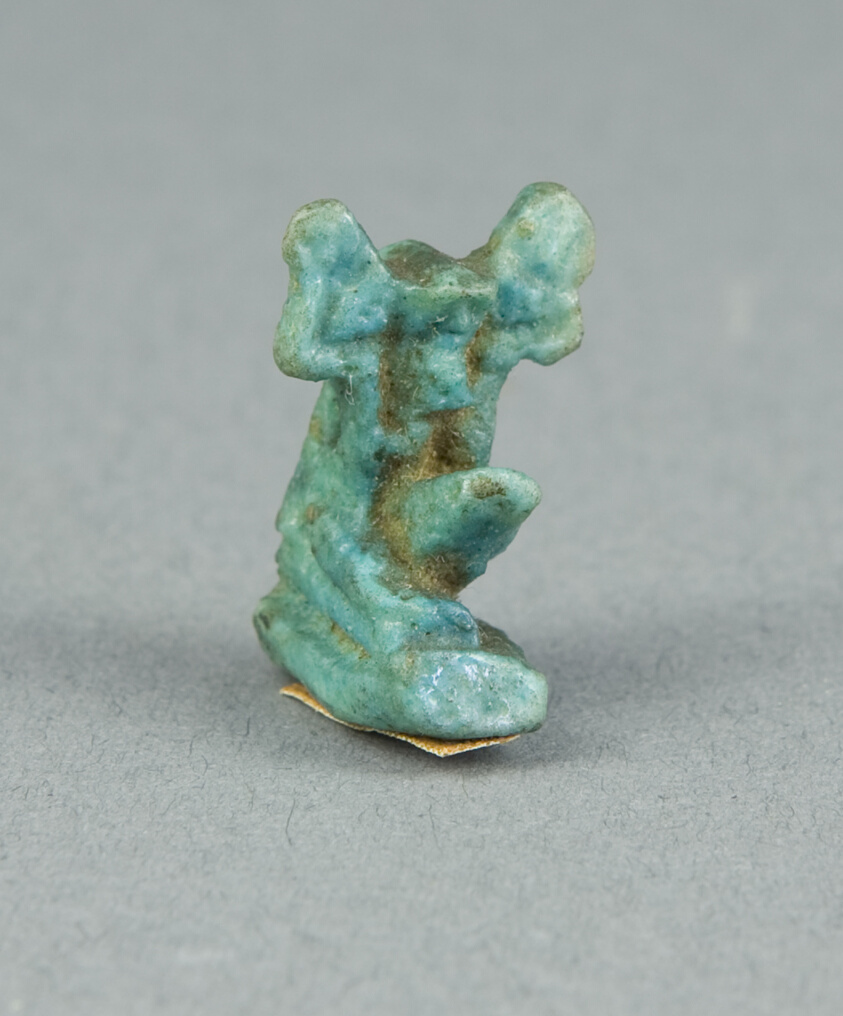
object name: Costume and Accessories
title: Amulet of the God Shu with Disk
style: egyptian, ancient, late period (egyptian), ptolemaic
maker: Egyptian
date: Late Period–Ptolemaic (about 7th–1st century BCE)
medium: Faience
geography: Egypt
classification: amulet; jewelry; ceramics; ancient art; costume; faïence (composite material)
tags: gods (deities)